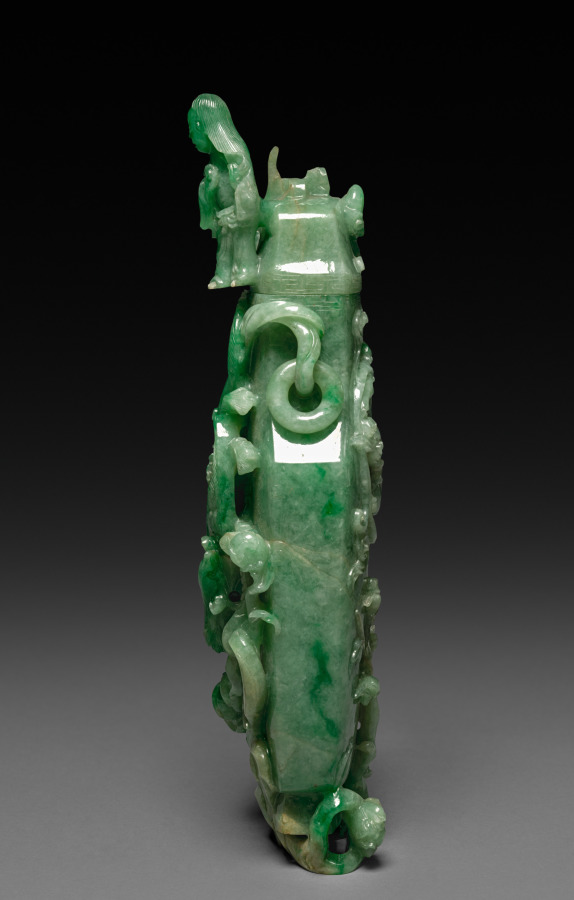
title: Three-Sectional Altar Group: Cylindrical Carving with Phoenix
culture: China, Qing dynasty (1644-1911)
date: 1644–1911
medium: jade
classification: Jade